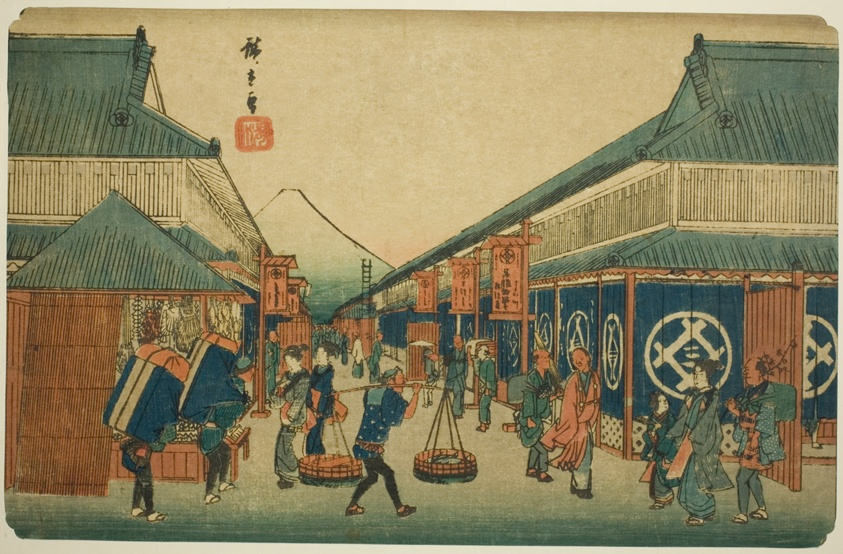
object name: Print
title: View of Surugacho (Surugacho no zu), from the series "Famous Places in the Eastern Capital (Toto meisho)"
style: Japanese (culture or style)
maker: Utagawa Hiroshige 歌川 広重; Japanese, 1797-1858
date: c. 1832/38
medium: Color woodblock print; oban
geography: Japan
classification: woodblock print; print; asian art